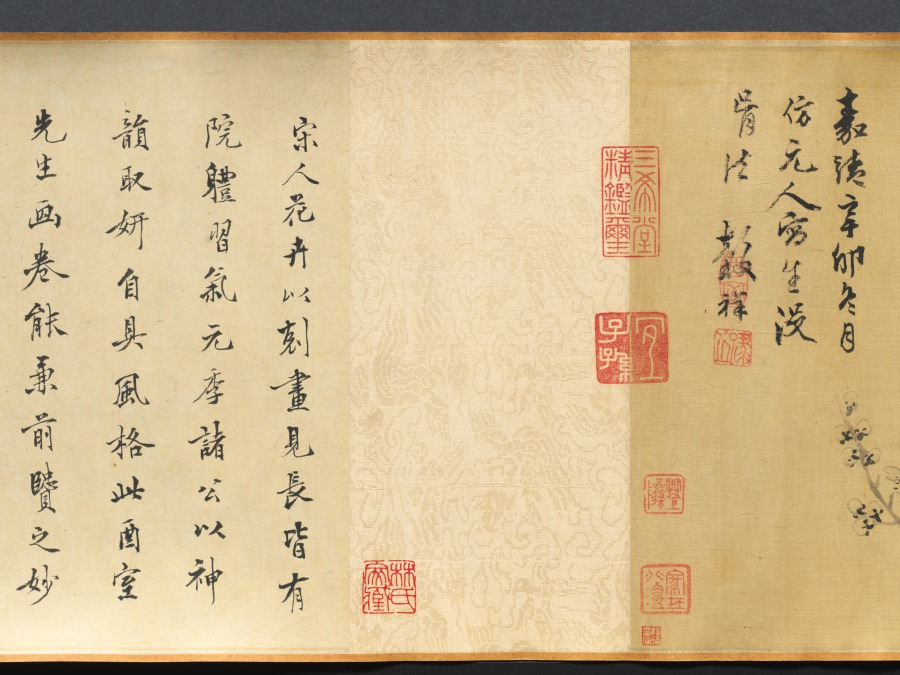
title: Flowers of Four Seasons, with Poems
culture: China, Ming dynasty (1368–1644)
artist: Wang Guxiang (Chinese, 1501–1568)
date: 1531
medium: handscroll; ink and light color on silk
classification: Painting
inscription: Artist's inscription, signature, and 15 seals. Ink Orchids. Sewn as pendants for the man of worth, swaying quiety, fragrance in the valley. [seal] Hsiao-chu ts'un Peony. Wiping his face, the young gentleman Ho [Ho Yen of Wei, Three Kingdoms] appears to have been powdered. His previous life was the perfume-stealing Han Shou [of Chin, 265–419 CE], the fragrance still lingers. [seal] Ts'un-wu chai. Flowering Crab Apple, New Bamboo. Shao-lin [Du Fu, 712–770] had to put down his brush. [Flowering Crab Apple]. Yü-k'o [Wen T'ung, d. 1079) in vain wrote poems about [Bamboo]. [seal] Yu-shih. Lotus Flowers. When she turns her head, half-hidden by a fan, and casts a glance, all the beautiful women become colorless. [seal] K'ang yüeh huai. Loquat. Ripeness in summer. [seal] Lu-chih. Pomegranate Flower. Whenever I remember you I will send my thoughts, but where have you gone--the [skirt] of pomegranate red? [seal] Wu-ho Sheng. Day Lily. Plant the day lily to forget sorrow. [seal] Yu-shih. Chrysanthemum. The untrammelled joy at the eastern fence. [seal] Lu-chih. Begonia. Comparing it to the beauties of Spring, and spreading them out as trimming for the stone steps. [seal] Yu-shih. Hibiscus. In recent years I have always enjoyed looking at flowers; instead of dark red I preferred pink ones. [seal] Jen-sheng i-lou. Narcissus, Camellia. The jade girdle left behind at Lo River. [Narcissus]. The precious pearls glitter before Spring. [Camellia]. [seal] Lu-chih. Heavenly Bamboo (Nandina domestica). A single branch in the wintry season. [seal] K'ang yüeh huai. Plum. Fragrant snow in the Lo-fou Mountains. [seal] Ts'un-wu chai. In the eleventh lunar month of the hsin-mao year of the Jiaqing era [1531], [I] imitated the boneless style of Yüan masters in sketching from life. Guxiang [seals] Yu-shih; Lu-chih. Translated by Wai-kam Ho/Lingyun Shih Liu (1980)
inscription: 2 colophons and 23 additional seals: 1 colophon dated 1632, and 2 seals of Li Jih-hua [Li Rihua] 李日華 (1565–1635); 1 colophon and 2 seals of Xiang Shengmo 項聖謨 (1597–1658); 3 seals of Liang Qingbiao 梁清標 (1620–1691); 6 seals of the Jiaqing 嘉慶 emperor (r. 1796–1820); 9 seals of Ch'eng Ch'i [Cheng Qi] 程琦 (1911–1988)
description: In this painting, flowers are loosely arranged by the seasons: narcissus and peony represent early spring; yellow loquat and lotus, summer; chrysanthemum, autumn; and the plum and evergreen bamboo, winter. The artist added to each flower a poetic line of calligraphy associating each plant with a historic or legendary figure. For example, the chrysanthemum, along with the line “The untrammeled joy at the eastern fence,” refers to the poet Tao Yuanming (died AD 427) who enjoyed chrysanthemums at the eastern fence in his garden. The scroll illustrates Wang Guxiang’s mastery of free brushwork, combining light monochrome ink with transparent colors. In his inscription, Wang says he used the “boneless” style without outlines as developed during the Yuan dynasty (1279–1368). Wang was a native of Changzhou, a city in southeast China known for its rich flora and fauna, and flower-and-bird painting tradition.